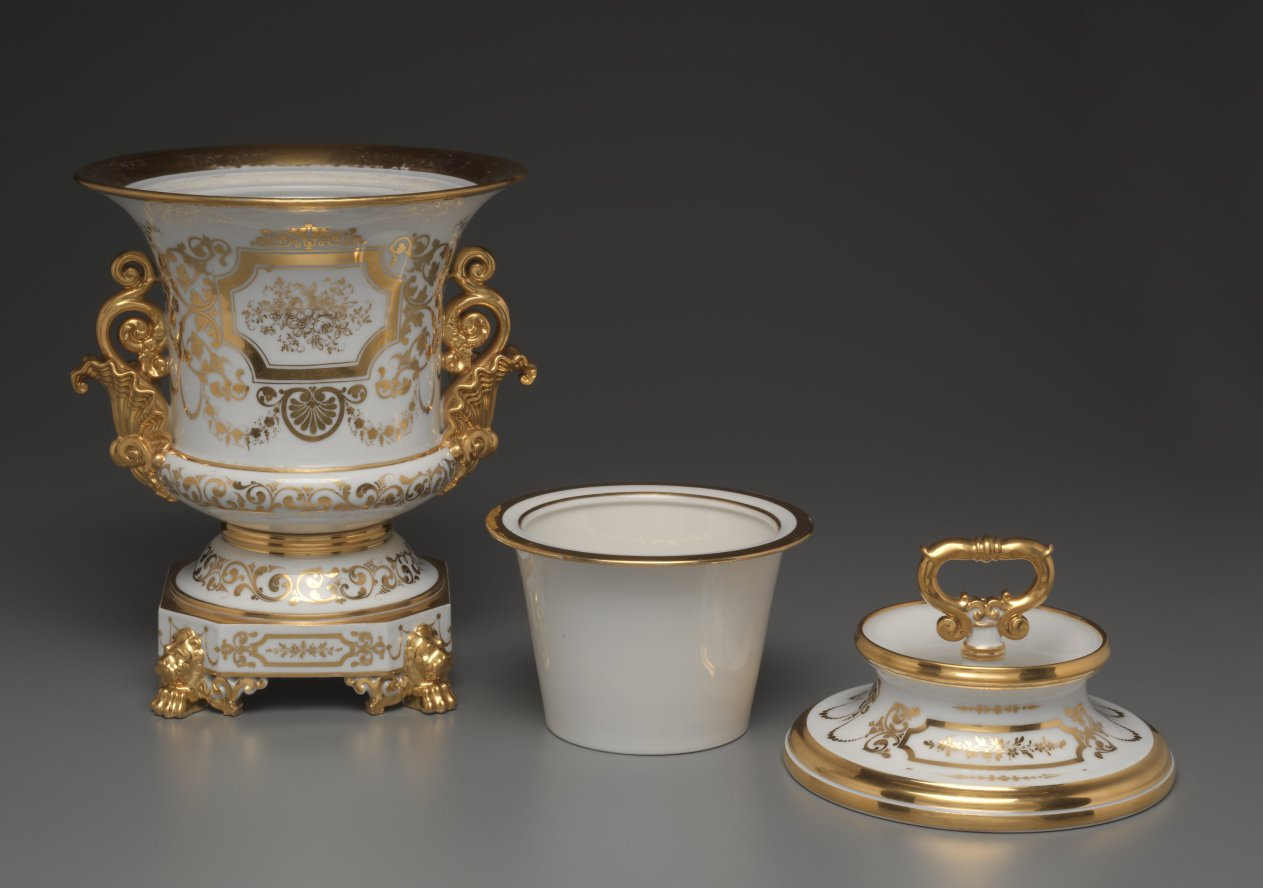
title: Covered Ice Cream Pail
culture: France, Paris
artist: Factory of Jacob-Petit (French, 1830–1865)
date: c. 1840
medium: gilt porcelain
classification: Ceramic